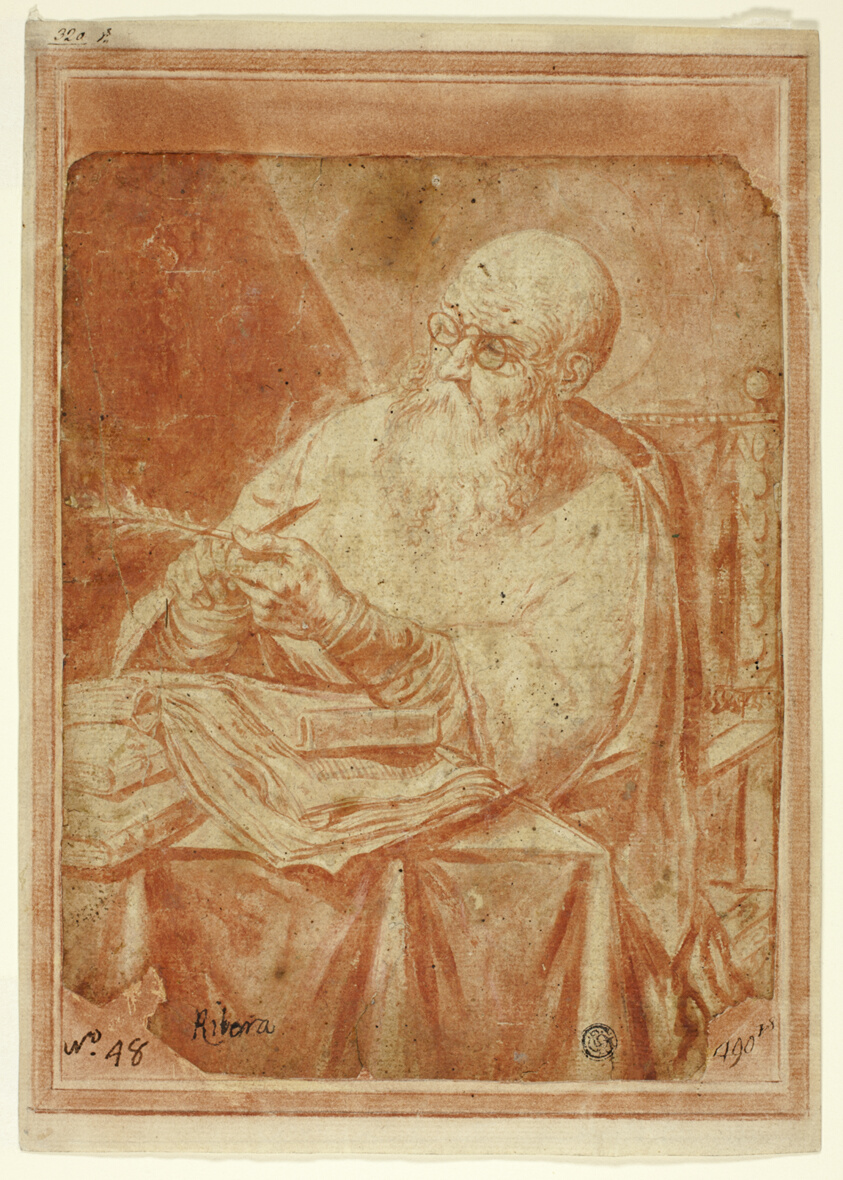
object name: Drawing and Watercolor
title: Saint Sharpening a Pen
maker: Unknown Artist; Spain, 17th Century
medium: Brush and red wash, over traces of black chalk, on cream laid paper, laid down on ivory laid paper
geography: Spain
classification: ink or chalk wash; drawings (visual works); prints and drawing